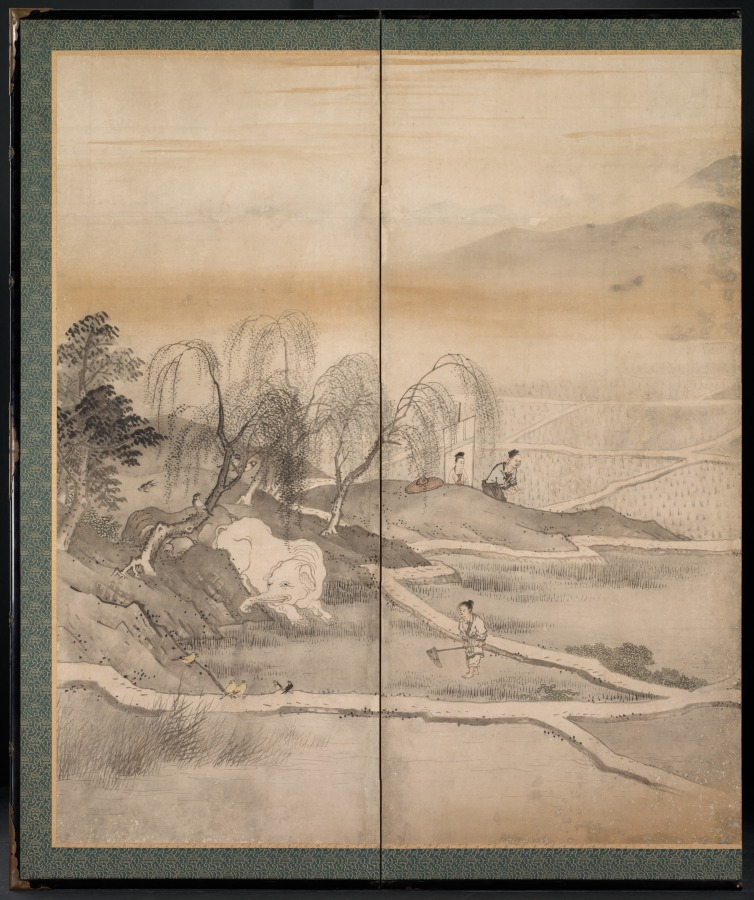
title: Emperor Yao Visiting Yu Chonghua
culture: Japan, Edo period (1615–1868)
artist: Kusumi Morikage (Japanese, active c. 1620–1690)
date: mid- to late 1600s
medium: One of a pair of six-panel folding screens, ink, slight color, and gold on paper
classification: Painting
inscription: signature and seal at lower right.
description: One of a pair, this screen shows a section of the narrative of how the Chinese Emperor Yao (about 2356–2255 BC) selected his successor, Yu Chonghua (about 2294– 2184 BC), who would become Emperor Shun. The artist who painted this screen, Kusumi Morikage, trained with Kano Tan’yō (1602–1647), painter-in-residence to Japan’s shogun, the country’s ruler, and was one of his four top students. Despite the conservative subject matter, Morikage’s distinctive sensibility shines through in his playful treatment of the gray and white elephants in the far left panel of the composition. According to legend, Chonghua was so virtuous that in the spring, elephants bounded down from the mountains to help him till the soil with their tusks.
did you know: The emperor's two-wheeled carriage sits in front of a thatched-roof farmhouse.